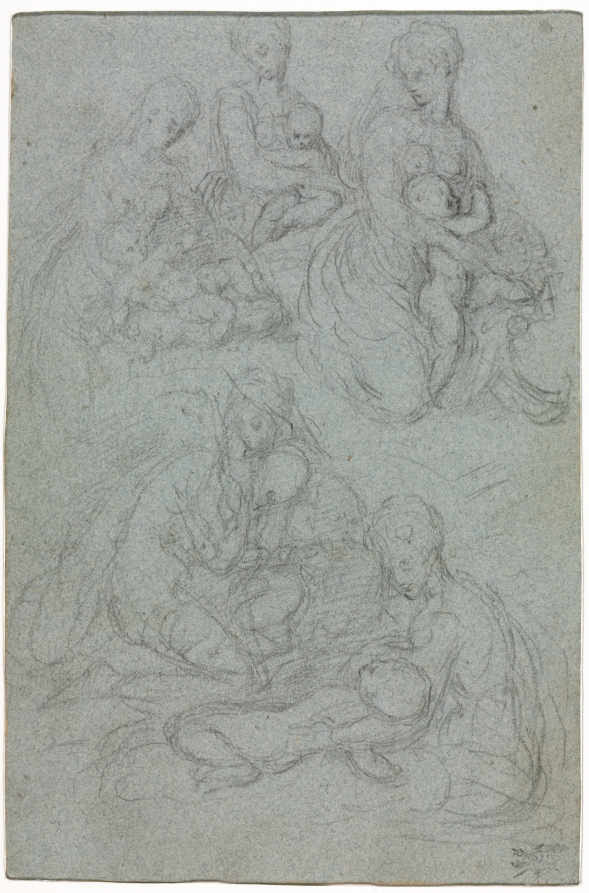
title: Sketches of Virgin and Child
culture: Italy, 16th century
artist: Giulio Campi (Italian, c. 1500–1572)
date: 1550–1600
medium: black chalk; framing lines in traces of gold ink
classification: Drawing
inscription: Parmigiano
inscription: Parmigeano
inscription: L.74 g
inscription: A3543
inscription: 13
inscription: F. C. 2489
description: This sheet of sketches was drawn from imagination in preparation for a painting. Here, the artist explored five different ways to capture the motion of a restless child enfolded in its mother’s embrace. Blue-gray papers like this were made from indigo-dyed rags and typically used for drawings by 16th-century Venetian artists such as Giulio Campi to study the painterly effects of light and shade.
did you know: Sixteenth-century artists from the northern provinces of Italy like Giulio Campi often focused on painterly effects such as light and shadow, rather than line, in their drawings.